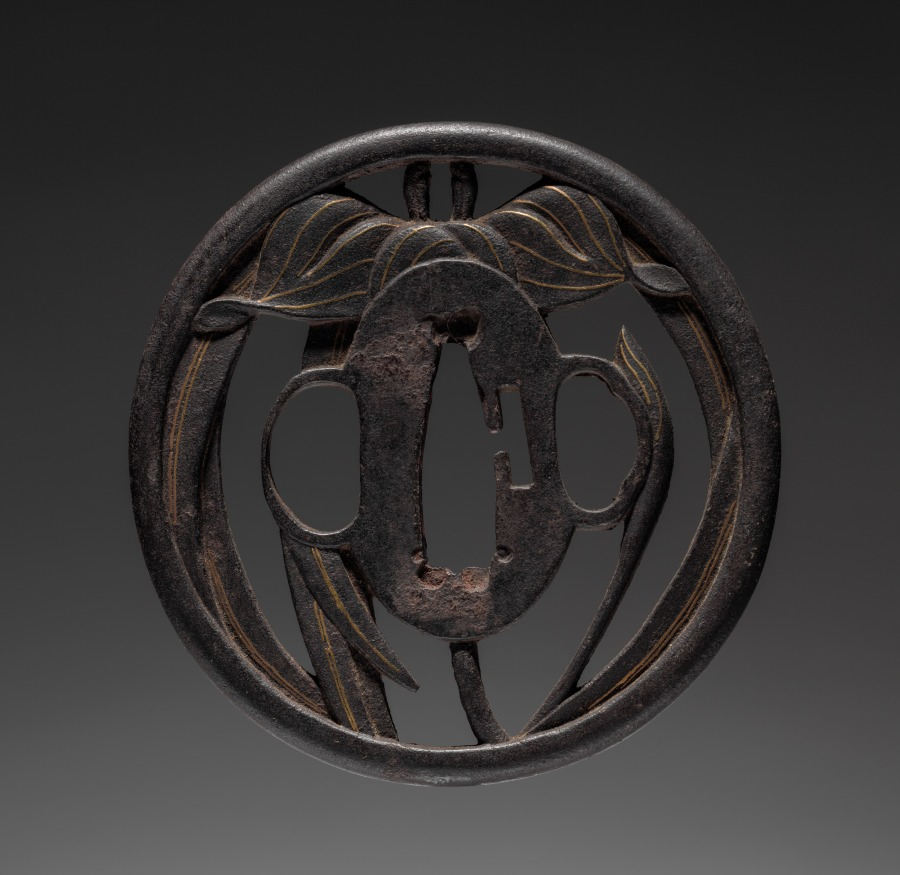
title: Sword Guard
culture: Japan, Edo period (1615–1868)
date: 1615–1868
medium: iron (Chosu type)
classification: Arms and Armor